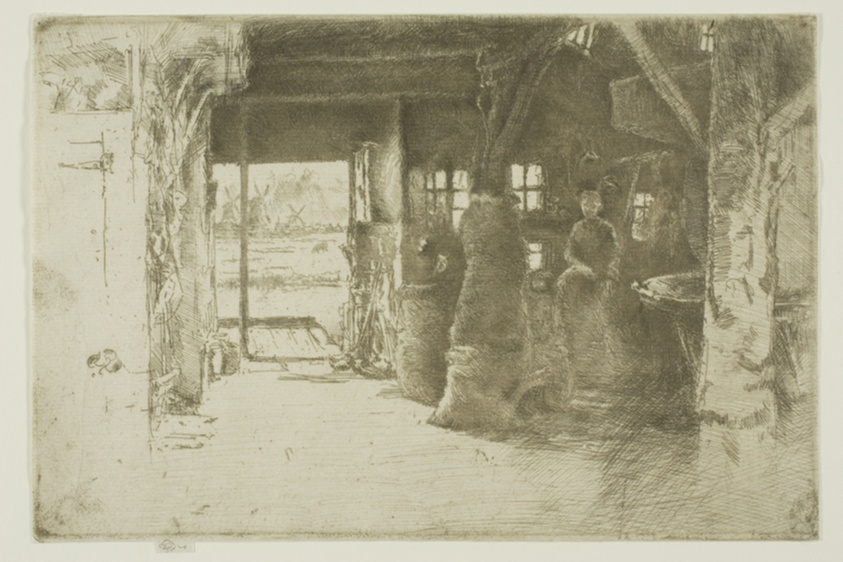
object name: Print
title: The Mill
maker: James McNeill Whistler (American, 1834-1903)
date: 1889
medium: Etching and drypoint with foul biting in black ink on ivory laid paper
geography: United States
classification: etching; foul biting; drypoint; print; prints and drawing; paper